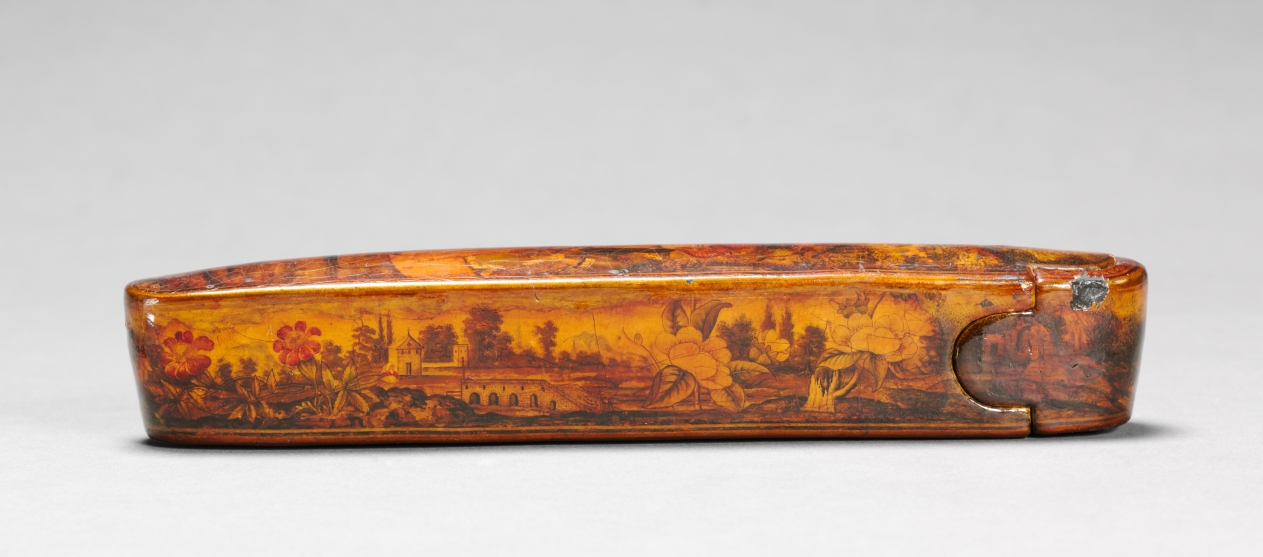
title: Pen and Ink Box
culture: Iran, probably Isfahan, Safavid period (1501–1722)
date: 1667–98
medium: Varnished lacquer and opaque watercolor over papier-mâché, ink, and copper alloy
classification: Lacquer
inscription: 1109